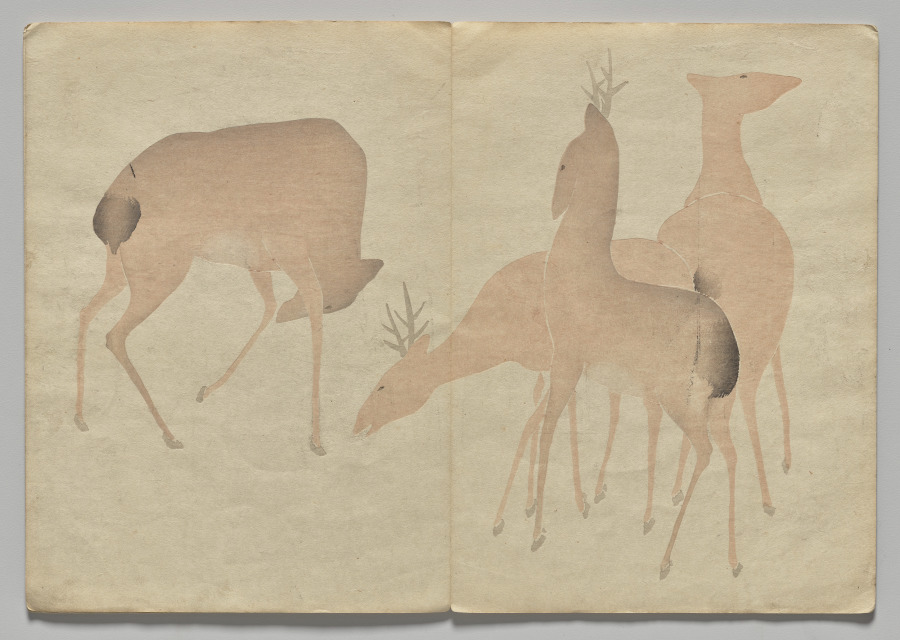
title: Scene from The Kōrin Picture Book (Volume 1)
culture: Japan, Edo period (1615–1868)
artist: Nakamura Hōchū (Japanese, d. 1819)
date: 1800s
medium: color woodblock printed book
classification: Bound Volume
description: Ogata Korin (1658-1716) was one of the most admired artists of Rimpa, or "decorative school painting." These books by the charming later-generation Rimpa artist Hochu record Korin's inventive designs.